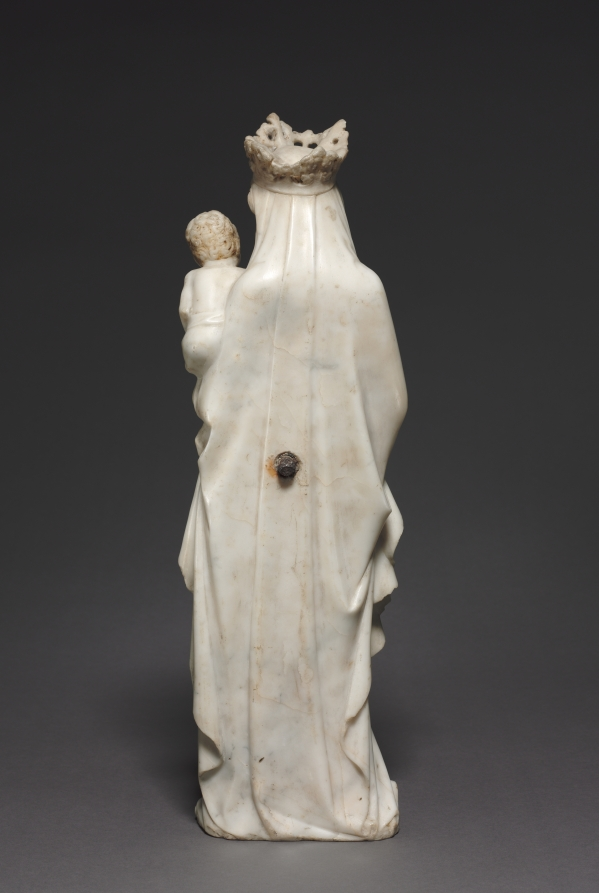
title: Virgin and Child with a Bird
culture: France, Île-de-France, Paris, 14th century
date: c. 1350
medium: marble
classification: Sculpture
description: The Virgin and Child represents one of the most frequent subjects for free-standing sculpture in 14th-century France, motivated by the developing cult of the Virgin and increasing veneration of Mary. Such sculptures were not restricted to churches, but were also found in roadside shrines, entrances to towns, and domestic use in private chapels. The small scale of this statuette suggests it was made for private veneration. The bird, held in the Virgin’s right hand, was a well-known symbol of the human soul and represents Christ’s role as redeemer of humankind.